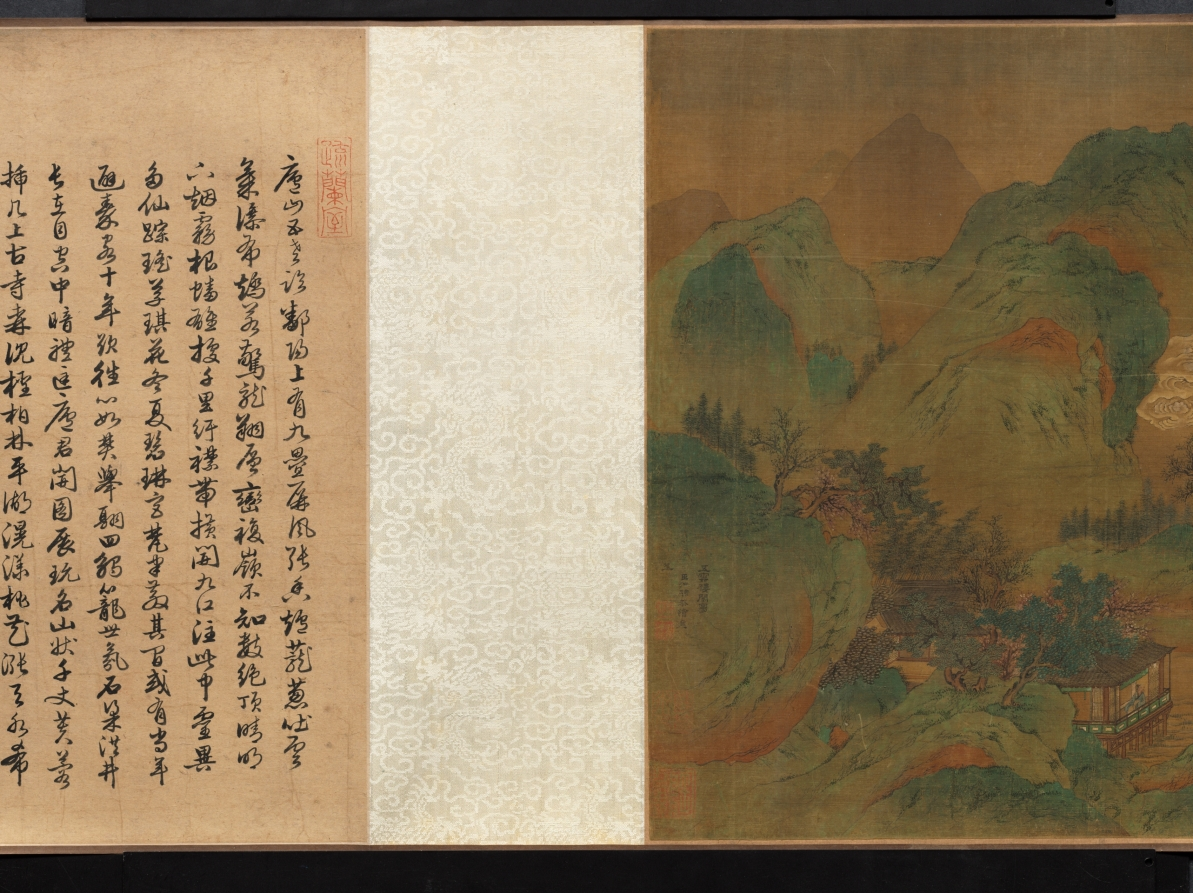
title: Landscape, The Palace of the Clouds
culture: China, Qing dynasty (1644-1911)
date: 1644–1911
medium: handscroll, ink on silk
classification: Painting